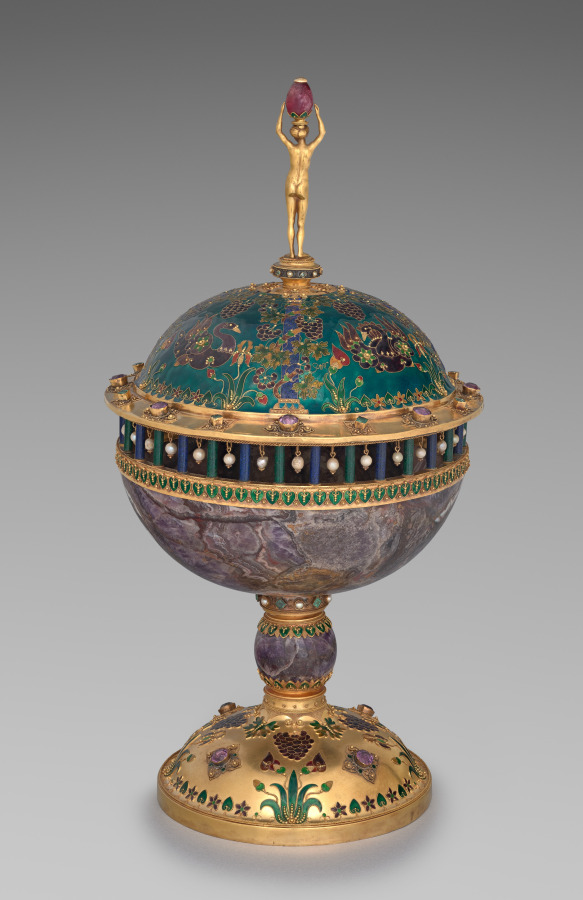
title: Covered Cup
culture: France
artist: Armand Point (French, 1861–1932)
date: c. 1897–99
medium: gilt copper alloy, enamel, amethysts, emeralds, ruby, pearls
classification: Metalwork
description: Armand Point started his career as a painter, but in the late 1800s, he became increasingly interested in decorative arts. In 1896, he established the Atelier de Haute-Claire in Marlotte, a colony of artists who handmade works of art to a very high standard. This cup was made there and is particularly ornate, showcasing different materials such as metal, enamels, gemstones, and pearls, as well as goldsmithing techniques.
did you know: The cup was originally acquired by Émile Nail-Démellette, Point's old high-school friend and later his benefactor.